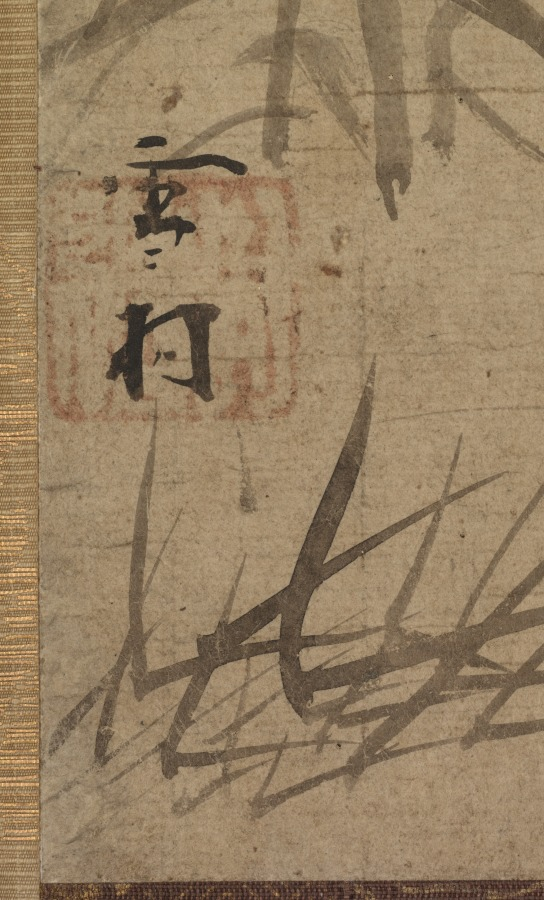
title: Mandarin Duck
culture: Japan, Muromachi period (1392–1573)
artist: Sesson Shūkei (Japanese, c. 1492–c. 1577)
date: 1500s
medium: hanging scroll; ink on paper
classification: Painting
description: In this painting, the artist depicted a scene of a solitary duck floating by reeds in a subtle arrangement of dry and wet, light and dark ink tones which conveys the tranquility of the moment.